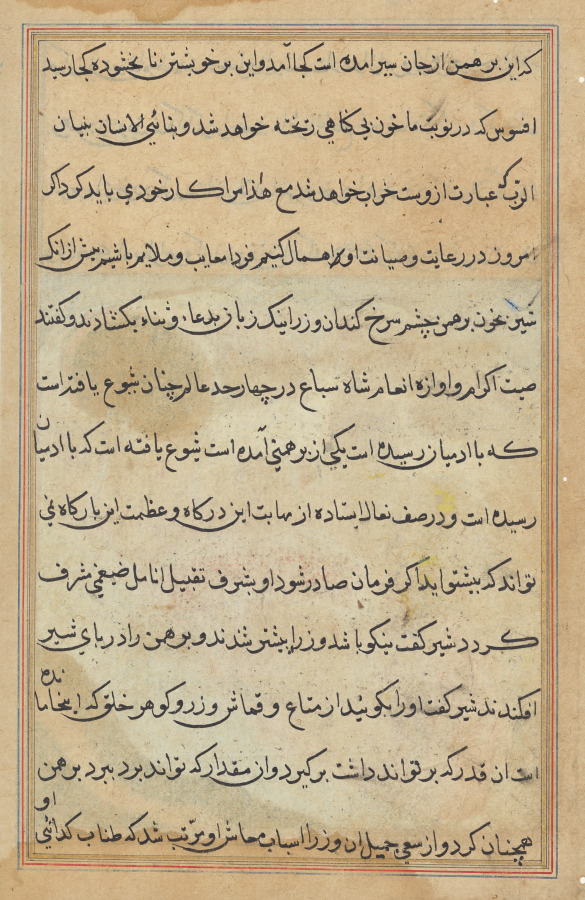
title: Page from Tales of a Parrot (Tuti-nama): text page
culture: Mughal India, court of Akbar (reigned 1556–1605)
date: c. 1560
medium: gum tempera, ink, and gold on paper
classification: Painting